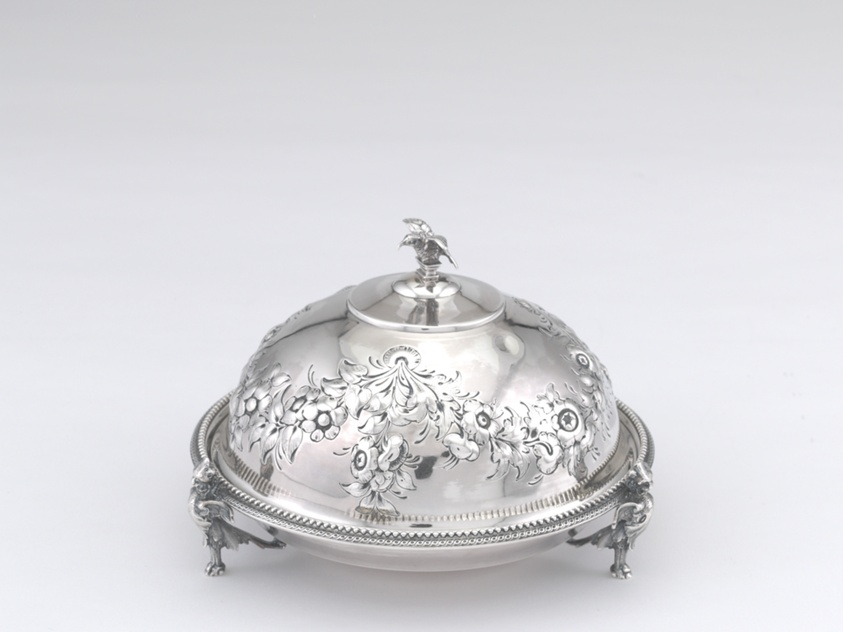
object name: Metalwork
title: Butter Dish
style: 19th century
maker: Gorham Manufacturing Company (American, founded 1831); Providence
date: 1853–65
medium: Silver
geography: Providence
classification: vessel for serving food; dish (vessel); silver; american decorative arts; american arts; decorative arts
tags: butter dish, birds, flowers, eagles, dining, eating